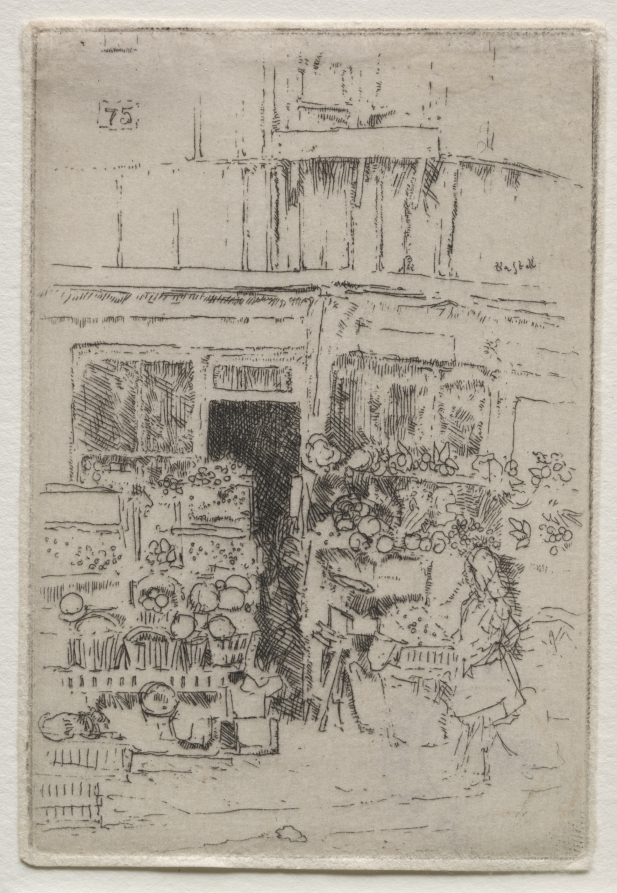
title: Paris: The Little Fruit Shop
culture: America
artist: Ernest Haskell (American, 1876–1925)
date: 1910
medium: etching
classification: Print